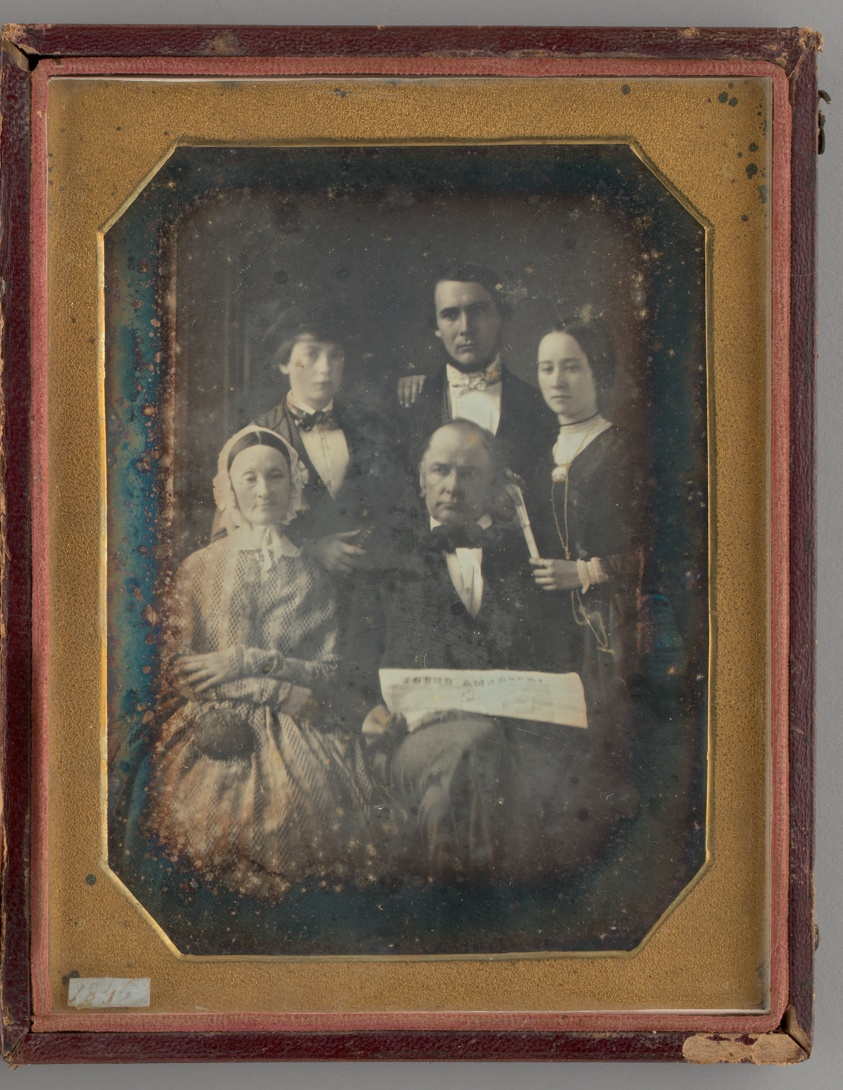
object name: Photograph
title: Untitled (Portrait of the Smith Family, New York)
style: 19th century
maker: Unknown maker; American, 19th century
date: 1845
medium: Daguerreotype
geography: United States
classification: portrait; photograph; photographic process; photography; portrait; daguerreotype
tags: lundberg collection, portraits, portraits: multiple subjects, portraits: child subject